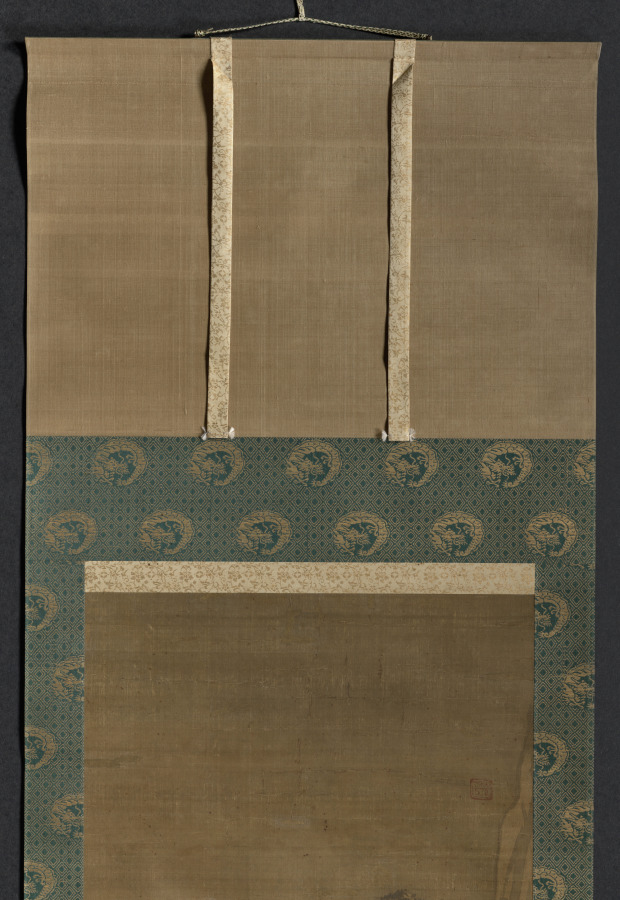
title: Bodhidharma Meditating Facing a Cliff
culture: China, Song dynasty (960-1279)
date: late 1200s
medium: Hanging scroll; ink on silk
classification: Painting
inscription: Spurious artist's seal of Yan Ciping 閻次平 [c. 1163–1189]. WKH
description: Bodhidharma is the legendary founder of Chan (Zen) Buddhism in China. Here he is seen meditating in front of a cliff, atop Mount Song. Behind him is his disciple Huike, the first recipient of his teaching.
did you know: Rough and calligraphic brushwork for landscape and drapery contrasts with more psychologically penetrating representation of the two protagonists' faces.